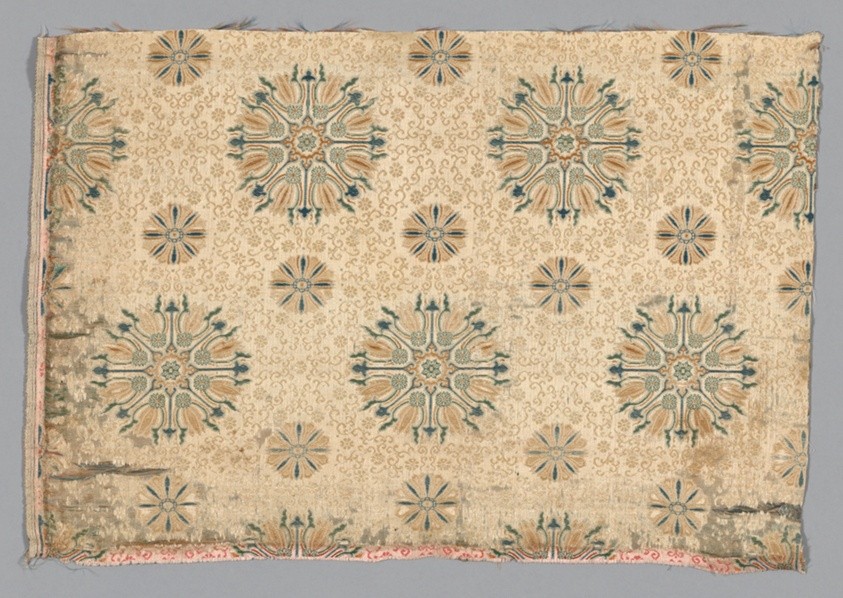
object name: Textile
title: Fragment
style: meiji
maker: Japan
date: Meiji period (1868–1912), 1875/1900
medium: Fancy compound satin, silk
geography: Japan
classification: textile; weaving